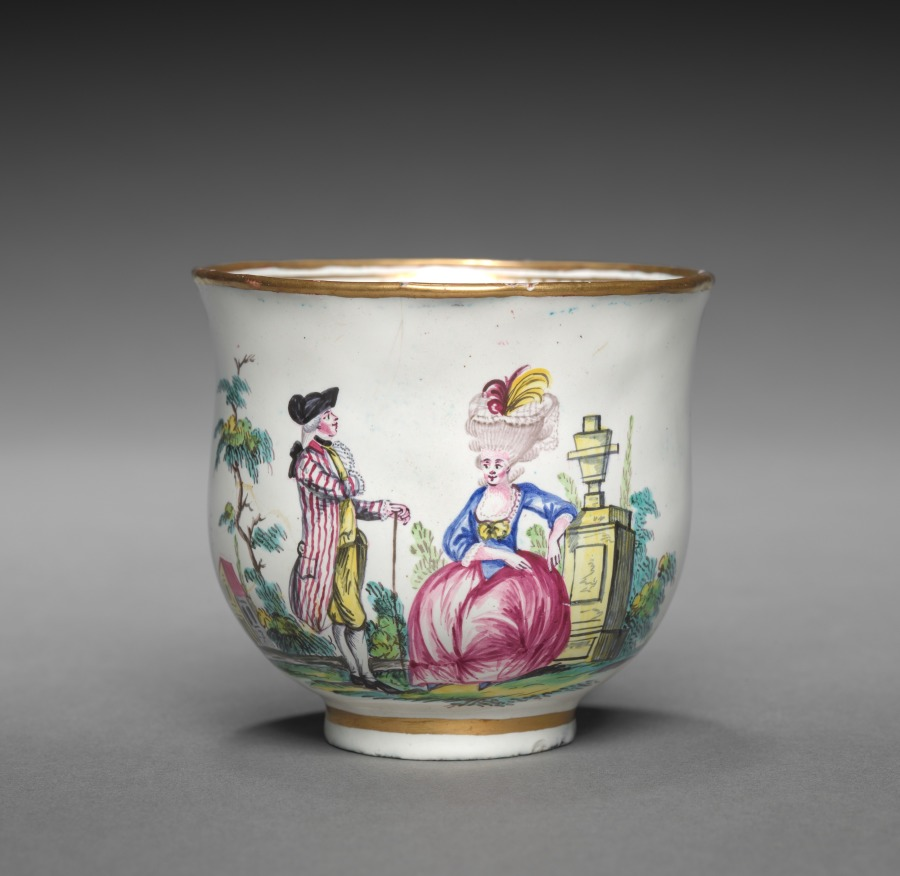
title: Cup and Saucer: Cup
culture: England, mid-18th Century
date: mid-18th century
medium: enamel on metal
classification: Enamel